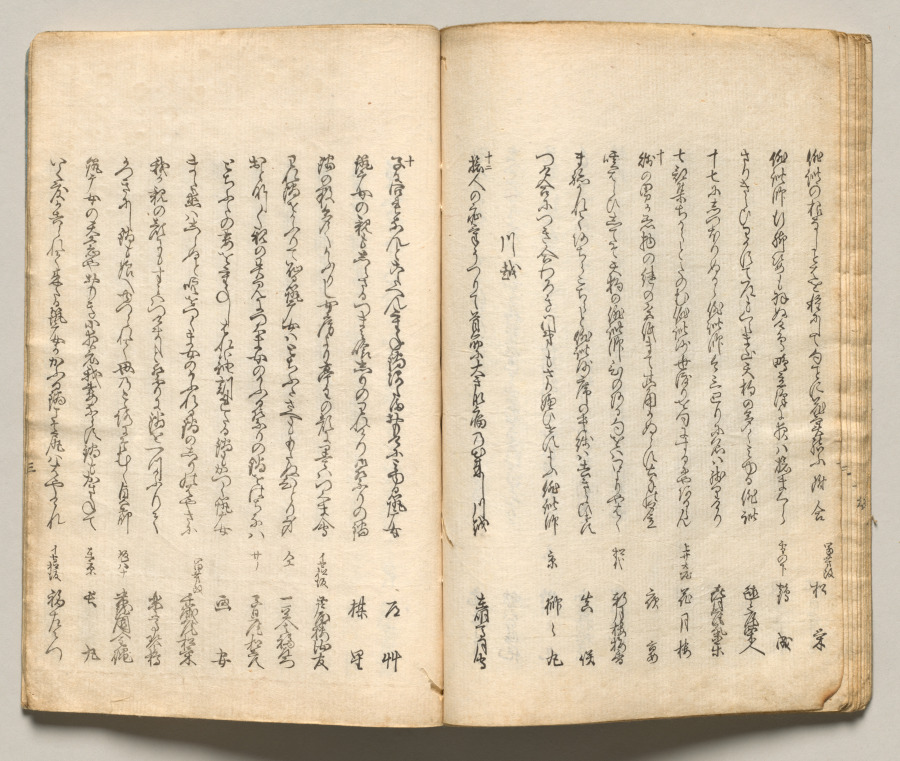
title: Spread Eleven from Volume Seven of People of Japan in Light Verse (Kyōka)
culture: Japan, Edo period (1615–1868)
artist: Utagawa Hiroshige (Japanese, 1797–1858)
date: 1857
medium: Woodblock-printed book; ink and color on paper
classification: Bound Volume